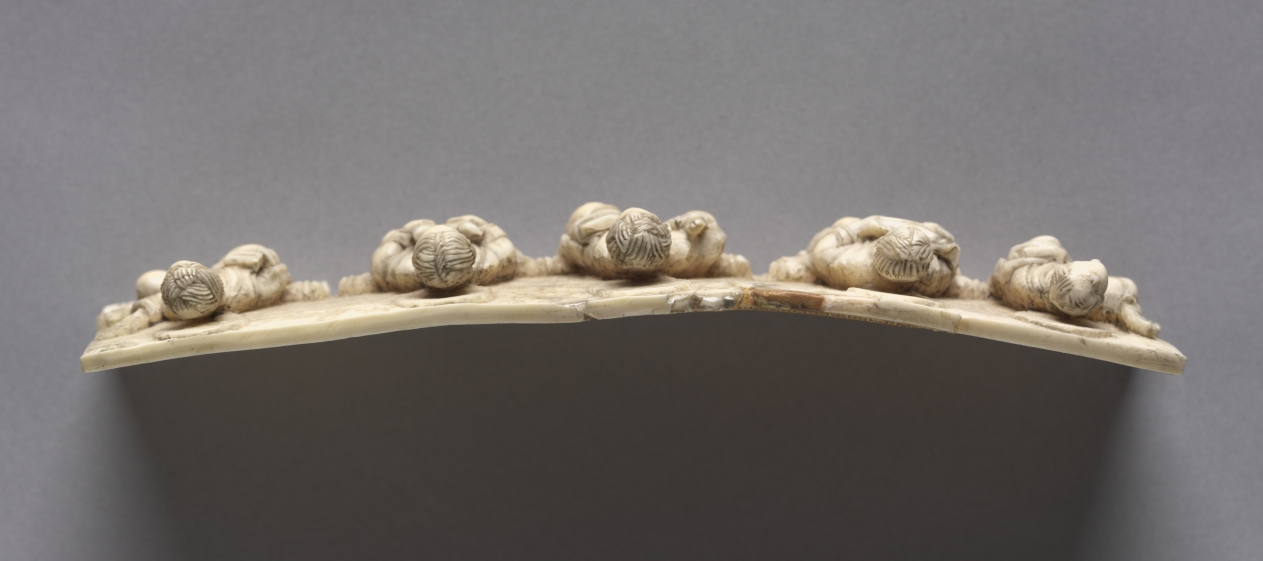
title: Plaque from a Portable Altar: Christ and the Apostles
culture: Germany, Lower Rhine Valley, Romanesque period, 11th century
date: 1050–1100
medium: walrus ivory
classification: Ivory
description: This intricately carved ivory panel once decorated the side of a portable altar. One of three it depicts Christ in Majesty and his apostles, and was the first major acquisition of William M. Milliken, the museum's first curator of decorative arts and later director (1930–1958). As Milliken later recalled, the pieces "were immensely intriguing, monumental in scale, even if tiny in size, the Christ in the mandorla could have been enlarged and would have graced the tympanum of a great cathedral."